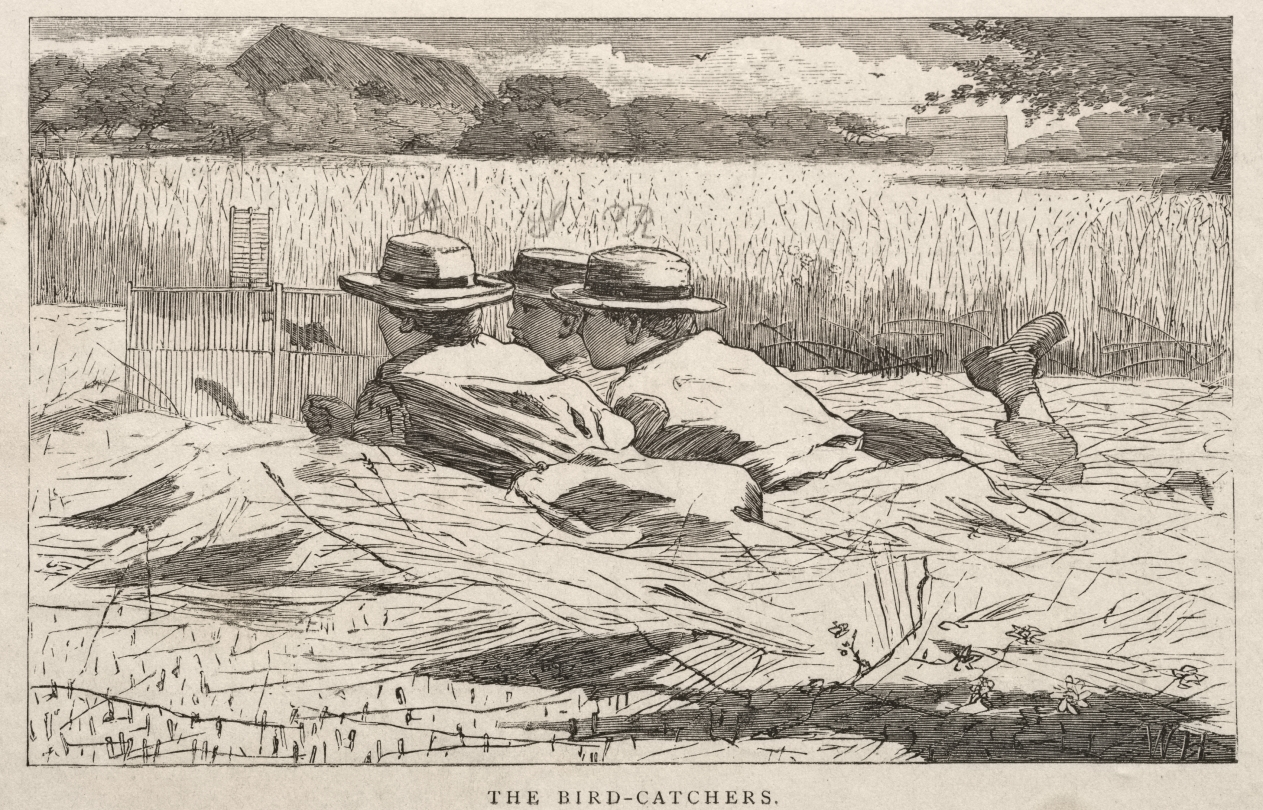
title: The Bird Catchers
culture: America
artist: Winslow Homer (American, 1836–1910)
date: 1867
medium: wood engraving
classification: Print